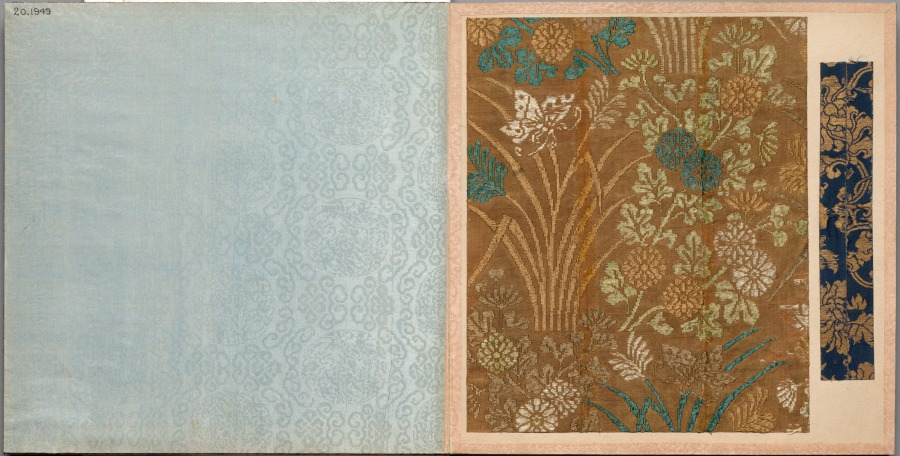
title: Album of Textile Samples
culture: Japan and China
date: 1700s–1800s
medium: silk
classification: Textile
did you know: This album has 26 pages containing 128 mounted Chinese or Japanese textile samples.